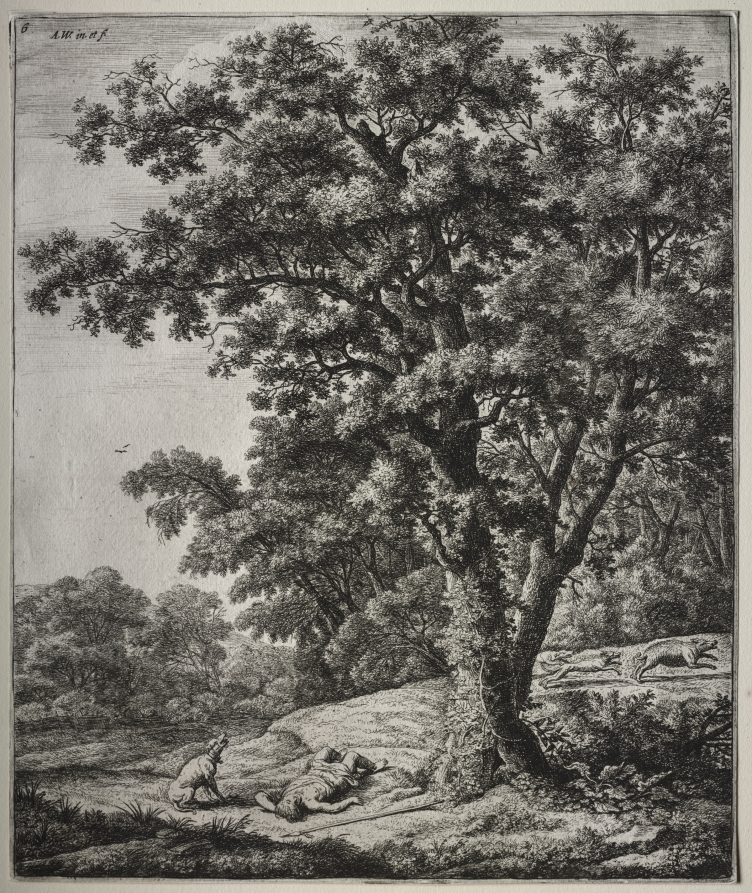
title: Six large upright landscapes with scenes from Ovid's Metamorphoses: The Death of Adonis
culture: Netherlands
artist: Anthonie Waterloo (Dutch, 1609/10–1690)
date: 1640–90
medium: etching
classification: Print